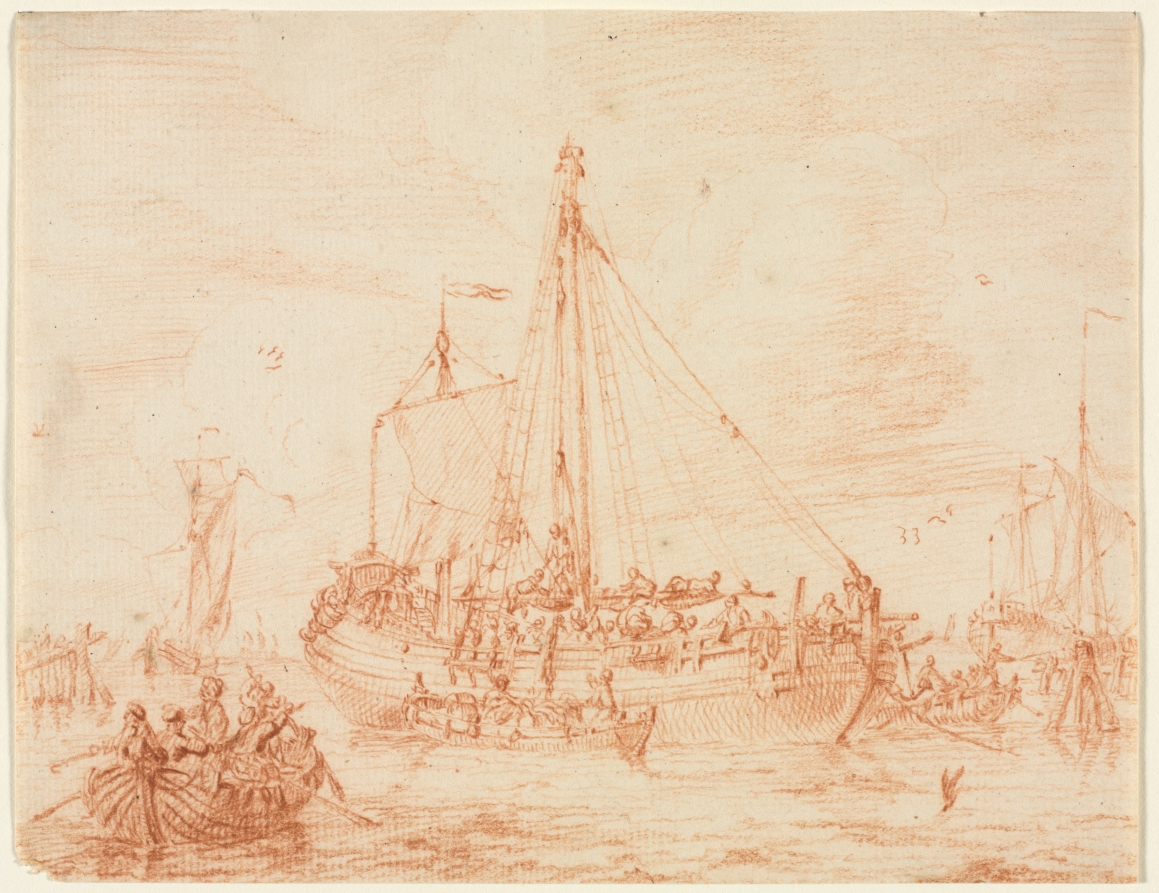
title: Preparation of the Herring Bark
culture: Netherlands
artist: Sieuwert van der Meulen (Dutch, 1730)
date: 1700–1730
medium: red chalk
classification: Drawing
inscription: VERSO, lower left, in graphite: no: 4